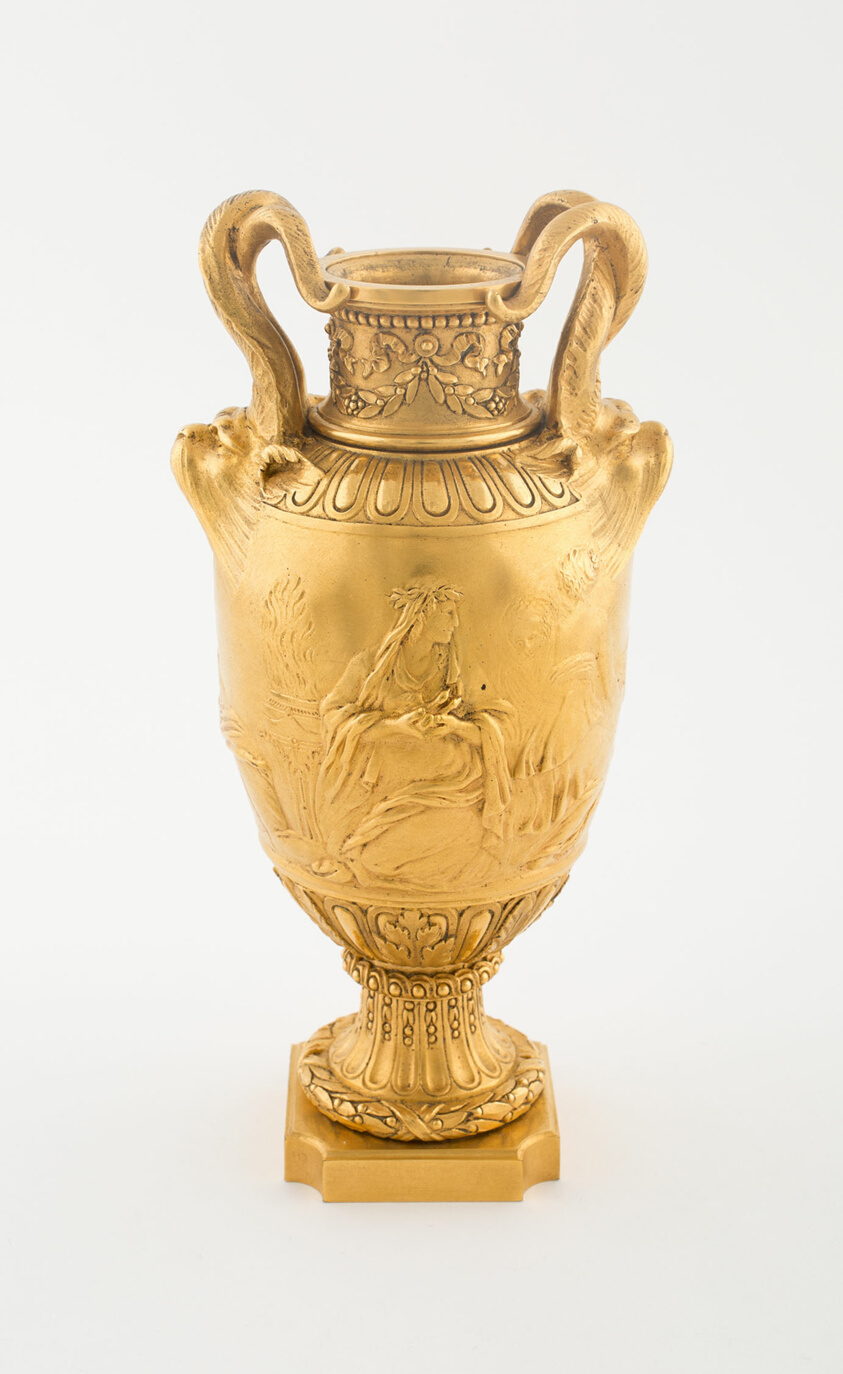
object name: Metalwork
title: Vase with Sacrifice Scene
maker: Ferdinand Barbedienne; French, 1810-1892; After Claude Michel Clodion; French, 1738-1814; Paris, France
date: Early to mid 19th century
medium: Gilt bronze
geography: France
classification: vase; bronze; vessel; metalwork; european decorative arts